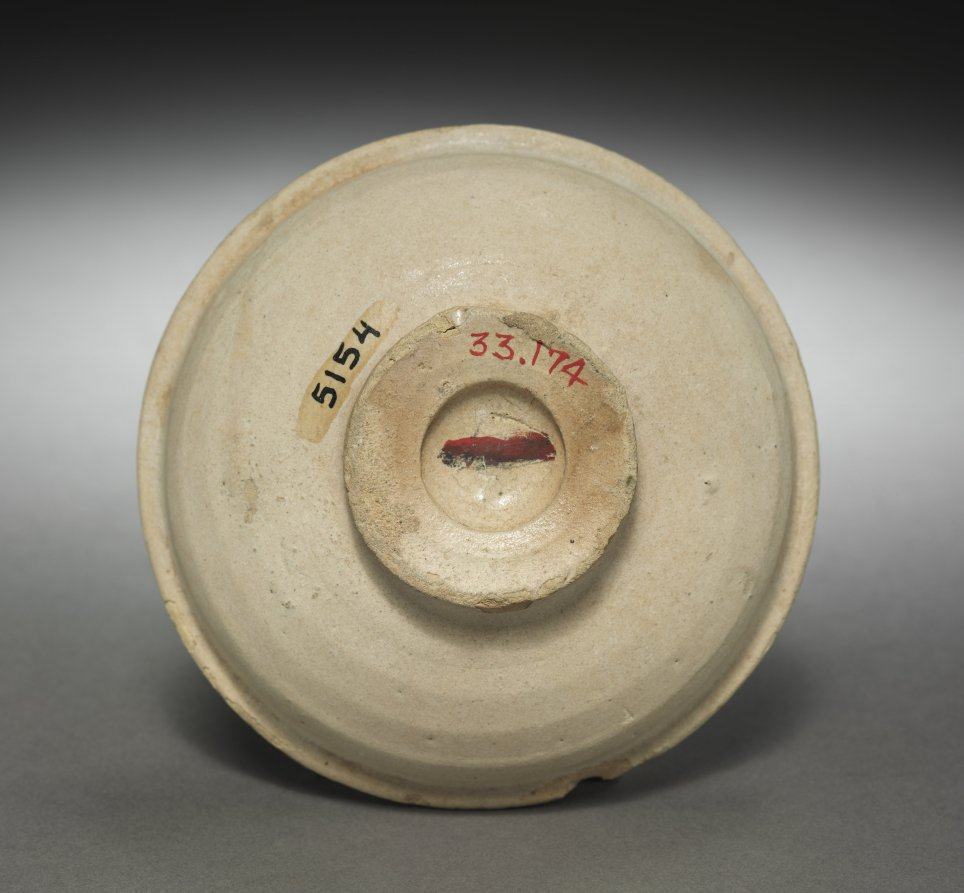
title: Small Bowl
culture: Parthian Empire (247 BCE–224 CE)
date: 1–200 CE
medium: terracotta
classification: Ceramic